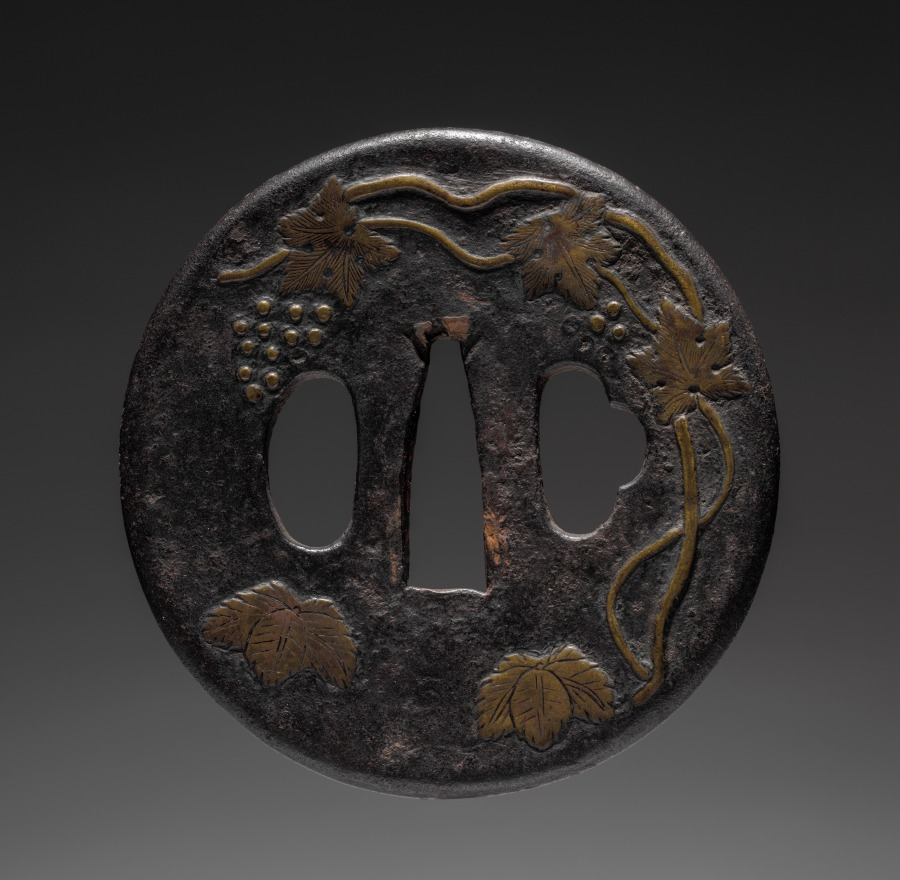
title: Sword Guard (Tsuba) with Grapevine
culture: Japan, possibly Edo period (1615-1868)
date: c. 1615–1868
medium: iron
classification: Arms and Armor